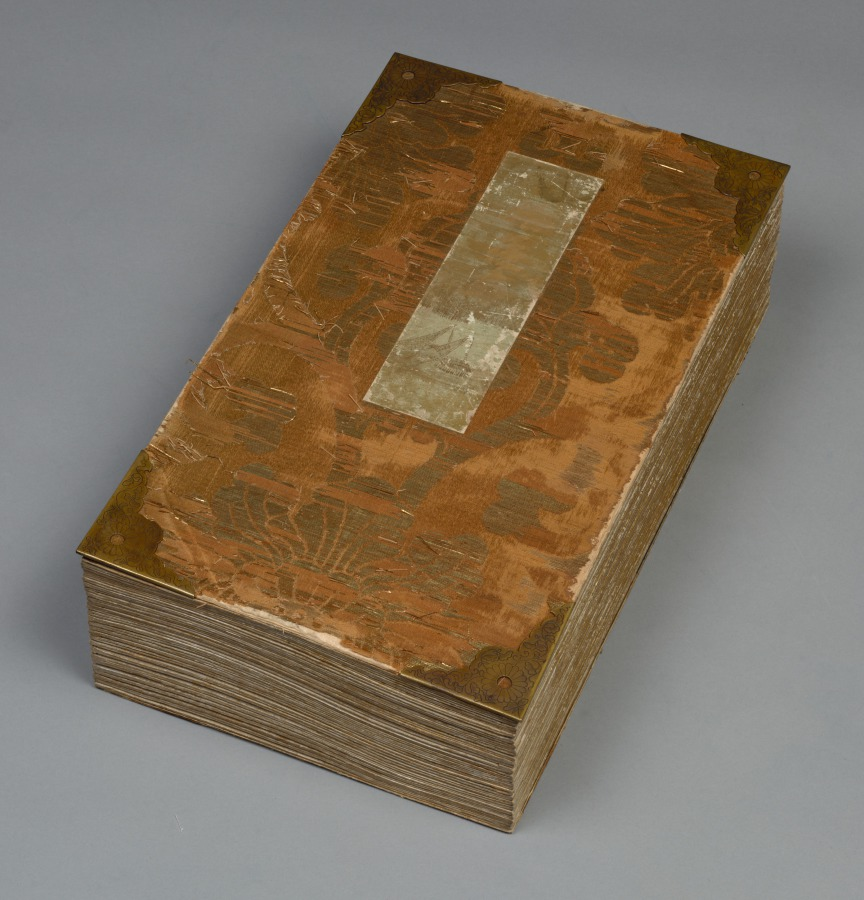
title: Album of Textile Samples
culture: Japan, Edo period (1615–1868)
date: 1600s-1700s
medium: silk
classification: Textile